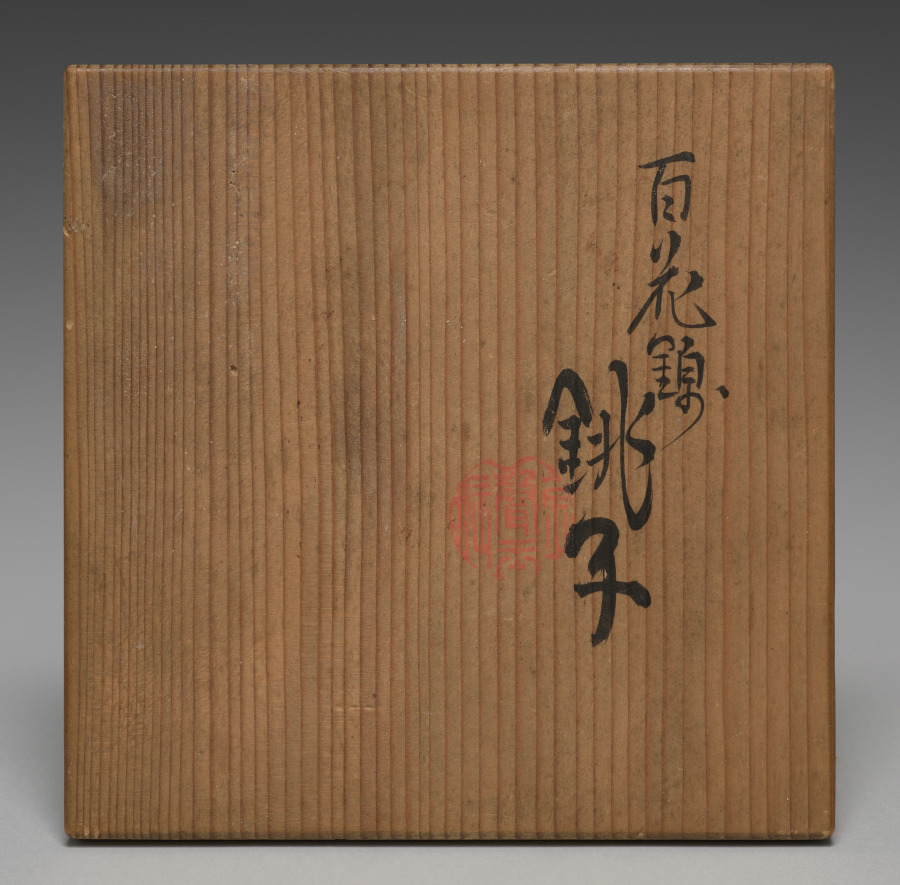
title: Sake Pourer with Flowers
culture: Japan, Meiji period (1868–1912)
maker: Seifū Yohei III (Japanese, 1851–1914)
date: 1893–1914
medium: Porcelain with molded design, overglaze color enamel, and metal handles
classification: Ceramic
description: This sake pourer is of a type called a chōshi. It is elaborately decorated with flowers in overglaze enamels in several colors, including black for the contour lines of leaves and stems; orange, white, gold, and two shades of green for the peonies; and purple for the thistles. The white blossoms have been built up with white enamel, then incised for a white-on-white eect; the orange and purple use an absence of color to produce the contours of individual petals. Yohei III referred to his works in multicolor overglaze enamels as “hundred flower brocades” (hyakka nishiki). Two small nyoi (C. ruyi) staff-head motifs, molded in clay and applied to either side of the lid, create handle rests, as well as natural places for the thumb and index finger of one hand to rest, so one can both secure the lid and steady the pour, while the handles are held in the other hand. The top of a nyoi staff resembles the curled cap of the reishi. Such scepters are imagined to be found in the hands of sages, Daoist immortals, or Buddhist deities and connote lofty goings-on and favorable circumstances. Since this sake pourer is unsigned, it may have been made for imperial family members to give as a gift.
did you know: This sake pourer with purple thistles and orange peonies shows off Seifū Yohei III’s technique of enamels painted over the glaze.